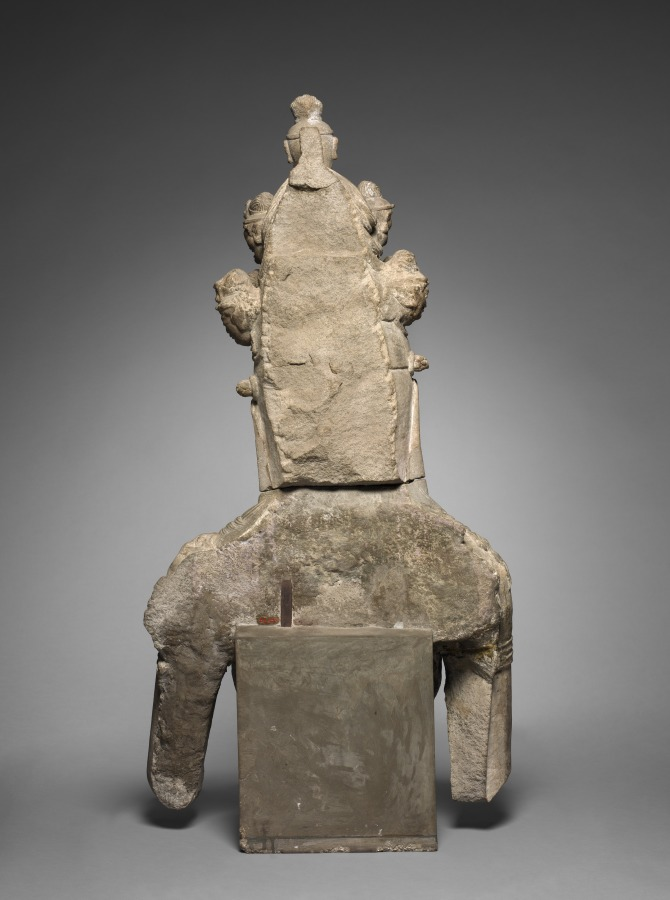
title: Eleven-Headed Guanyin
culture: China, Tang dynasty (618-907)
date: early 700s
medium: gray sandstone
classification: Sculpture